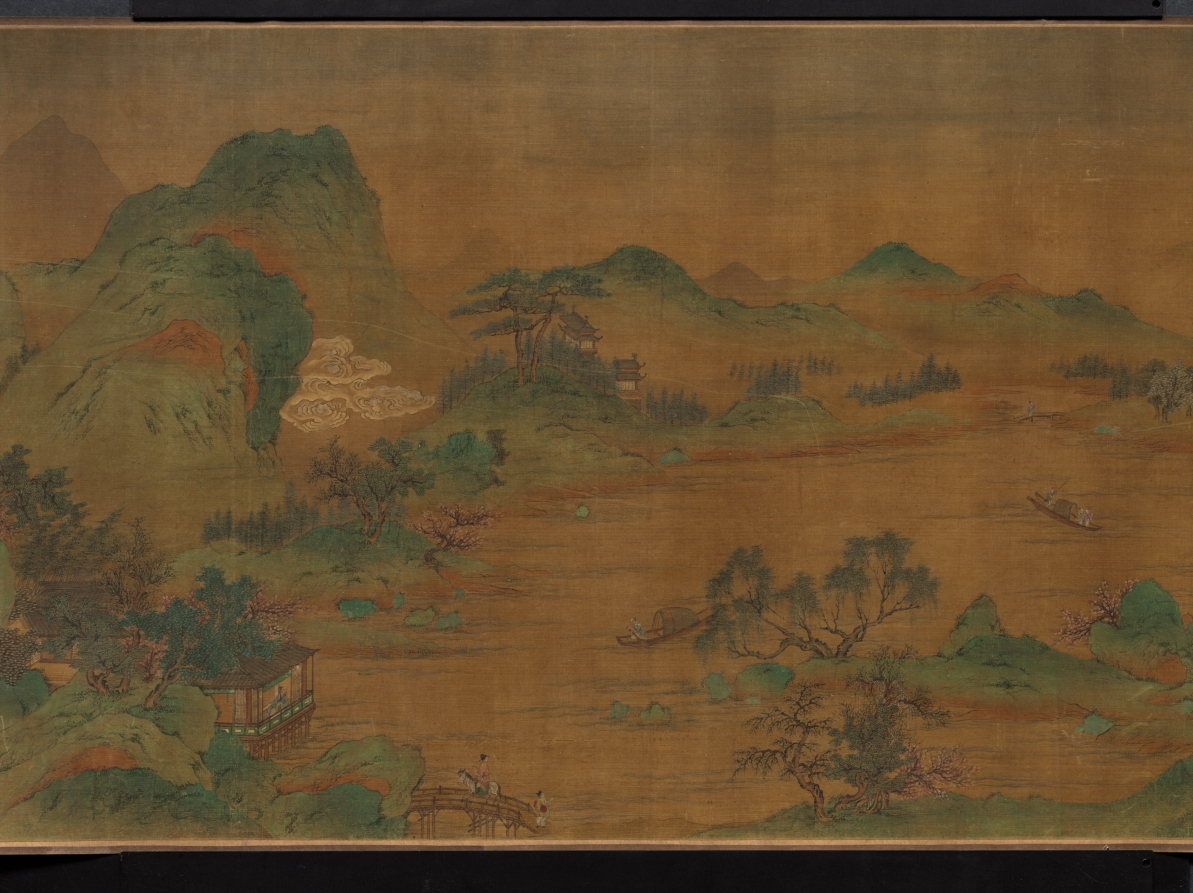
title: Landscape, The Palace of the Clouds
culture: China, Qing dynasty (1644-1911)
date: 1644–1911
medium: handscroll, ink on silk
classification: Painting